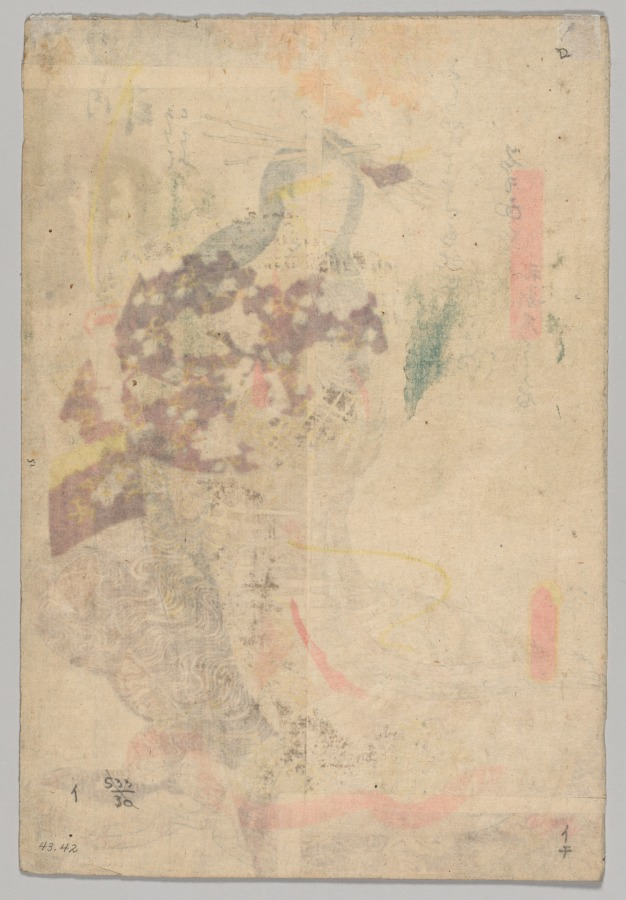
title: Tsubasa of Ōgiya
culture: Japan, Edo period (1615–1868)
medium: color woodblock print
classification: Print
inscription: Publisher Mark: Yamanaka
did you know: Tsubasa was a courtesan at the Ōgyia in Edo. The title of this print also lists her attendants (kamuro) Ageha and Kochō, but they are not depicted.